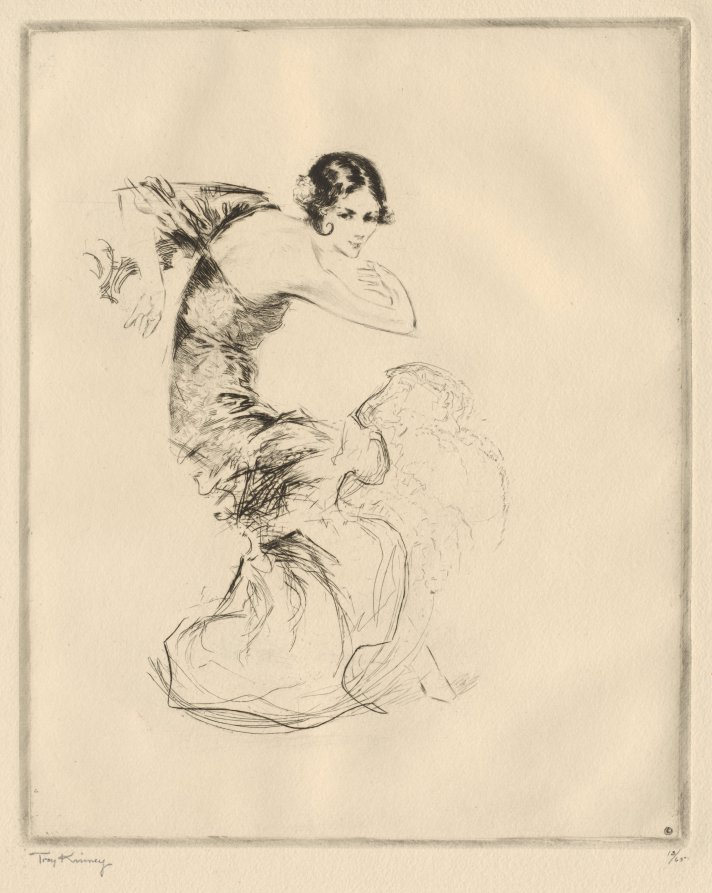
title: Pavlowa in "Carmen"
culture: America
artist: Troy Kinney (American, 1871–1938)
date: c. early 1900s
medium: etching and drypoint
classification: Print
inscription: Signed in pencil on bottom left beneath image: Troy Kinney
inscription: Marked in pencil on bottom right beneath image: 13/65